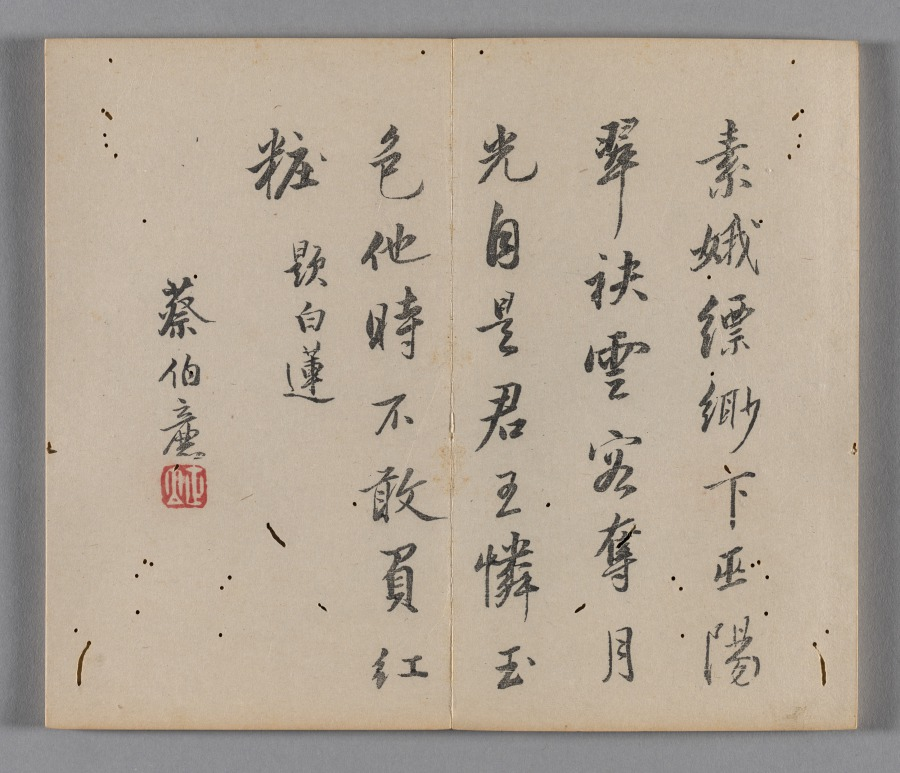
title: Ten Bamboo Studio Painting and Calligraphy Handbook (Shizhuzhai shuhua pu): Miscellaneous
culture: China, Qing dynasty (1644-1911)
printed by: Hu Zhengyan (Chinese, c. 1584–1674)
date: 1633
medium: Woodblock-printed book; ink and colors on paper; first edition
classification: Print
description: Color printing reached a level of perfection in the early 1600s, as seen in this Ten Bamboo Studio Collection of Calligraphy and Painting and the Mustard Seed Garden Manual of Painting (printed 1679 and 1701). The painterly quality, precision in registering (aligning) the woodblocks, and harmonious colors made them the most successful color print editions in Chinese history. Both editions were printed and compiled in Nanjing, spread nationwide, and had a great impact on the arts in Japan and Korea.